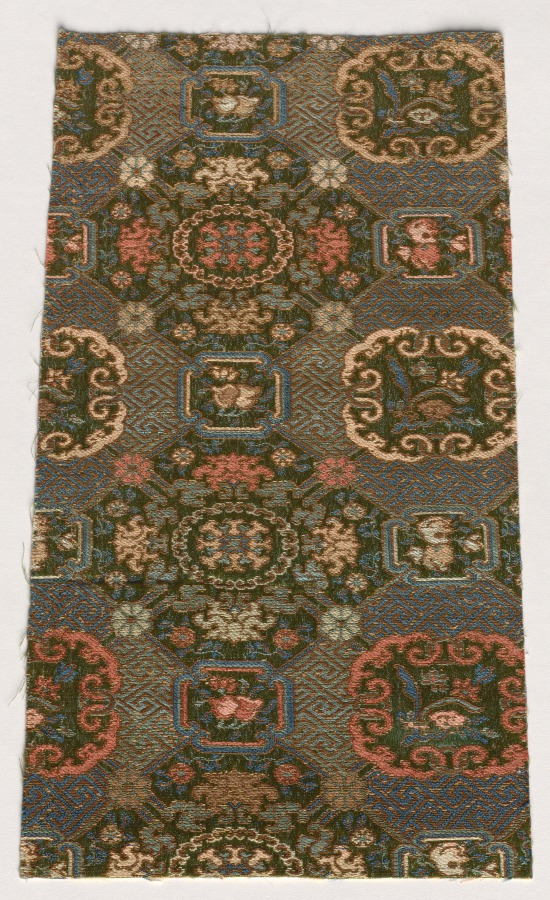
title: Textile Fragment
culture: Japan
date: 1800s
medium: silk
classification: Textile